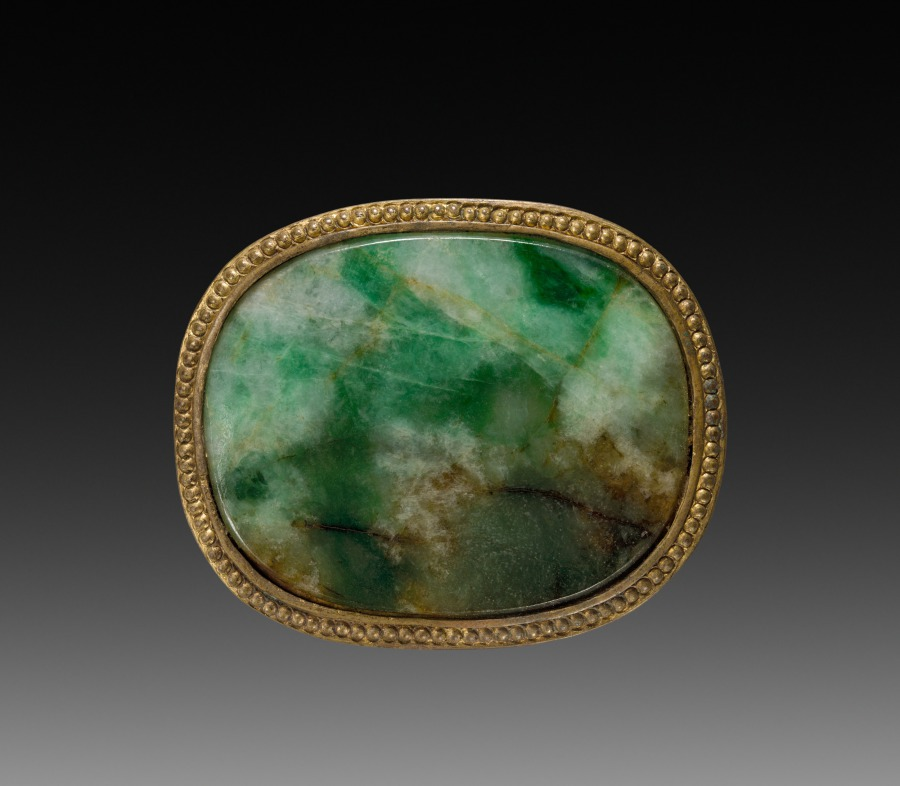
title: Buckle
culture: China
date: 1900s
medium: brass set with green jade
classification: Jewelry